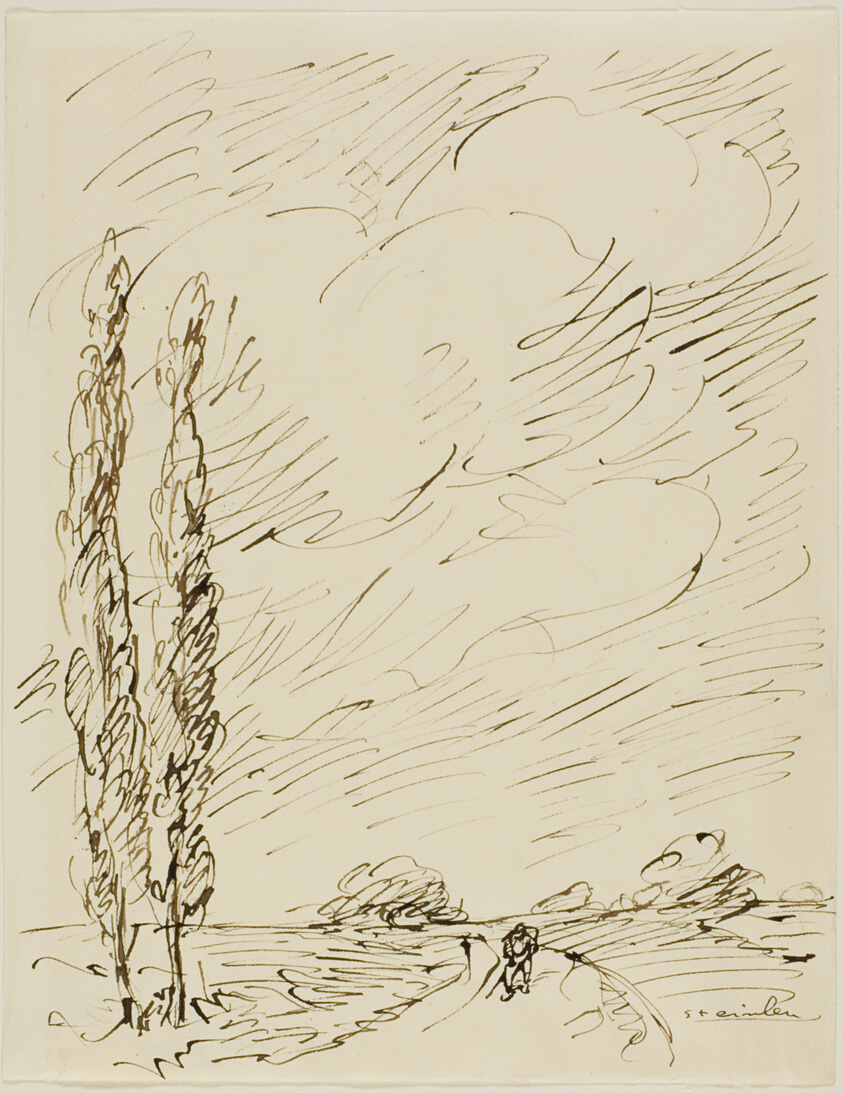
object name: Drawing and Watercolor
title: Tramp on a Road with Two Poplar Trees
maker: Théophile-Alexandre Pierre Steinlen (French, born Switzerland, 1859-1923)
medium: Pen and brown ink, on cream wove paper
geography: France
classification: pen and ink drawings; drawings (visual works); prints and drawing